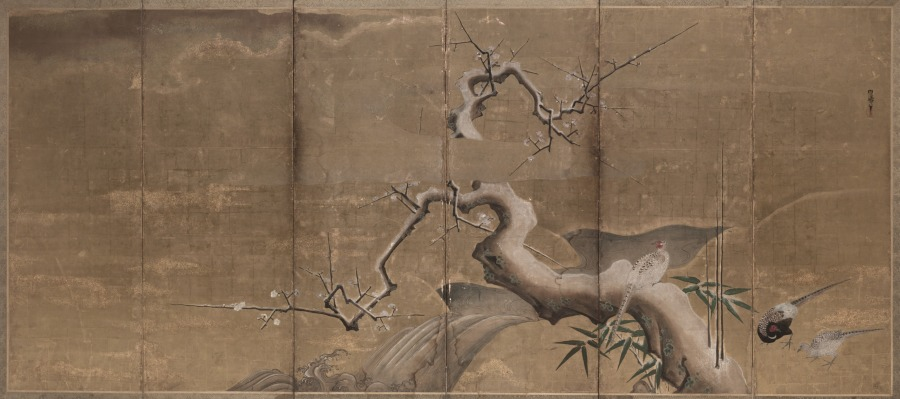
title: Winter Scene with Plum Trees and Pheasants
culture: Japan, Edo period (1615–1868)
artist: Kano Naonobu (Japanese, 1607–1650)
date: early 1600s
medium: pair of six-fold screens, mineral pigments and gold leaf on paper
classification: Painting